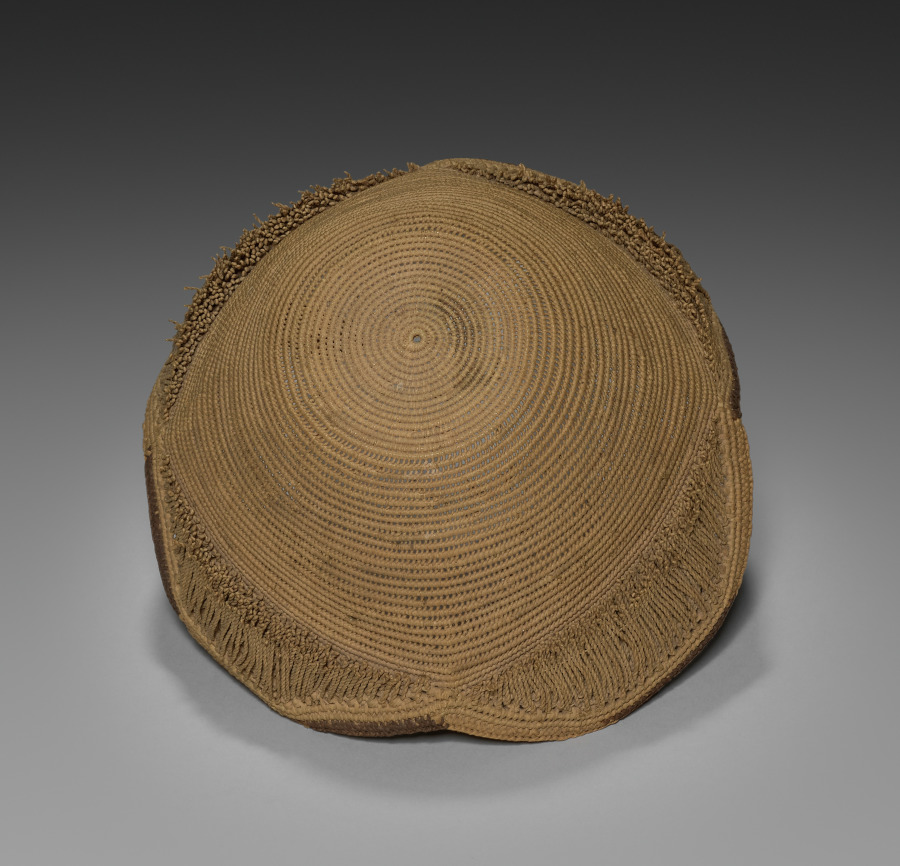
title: Hat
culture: Africa, Central Africa, Democratic Republic of the Congo, Kuba-style maker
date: early 1900s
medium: Raffia and dye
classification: Garment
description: Titled Kuba men and prominent women wear the laket, a small ornate dome-shaped hat. An essential fashion item of adult men in good social standing, it focuses special attention on the head as a significant marker of individual identity, ethnic affiliation, status, and role in society. This prestige object is secured on the crown of the head with a nine-and-a-half-inch metal pin that pierces through the hat onto a clump of hair. The laket is made from undyed raffia palm fiber that was then coiled into threads and woven. There are two examples of the laket: the plain type with the flat top, and the more elaborate type called the laket mishiing.